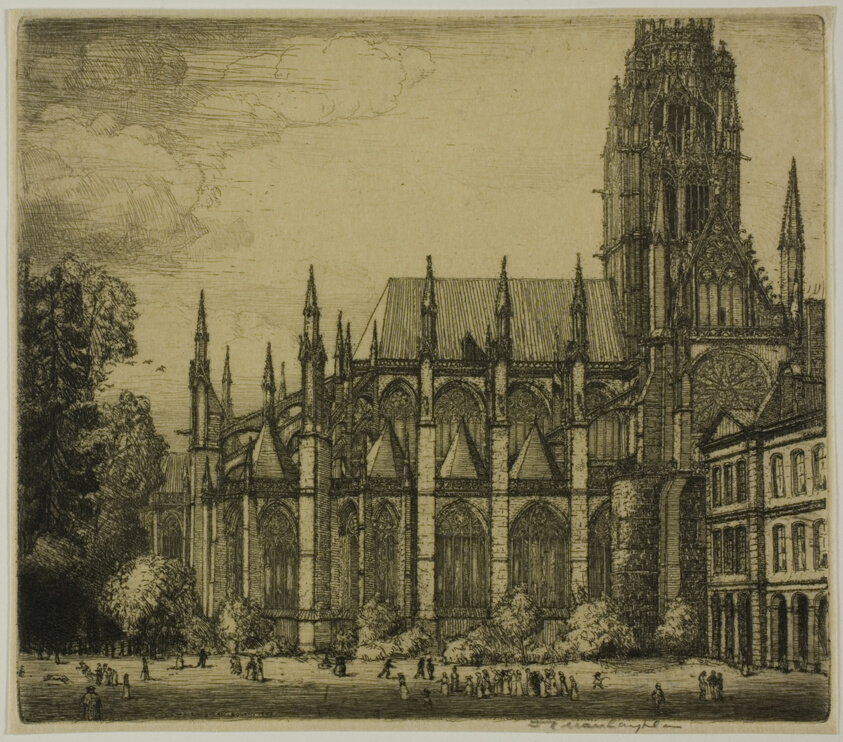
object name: Print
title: St. Ouen, Rouen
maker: Donald Shaw MacLaughlan (American, born Canada, 1876-1938)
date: 1903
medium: Etching in black on Japanese paper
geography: United States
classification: etching; print; prints and drawing